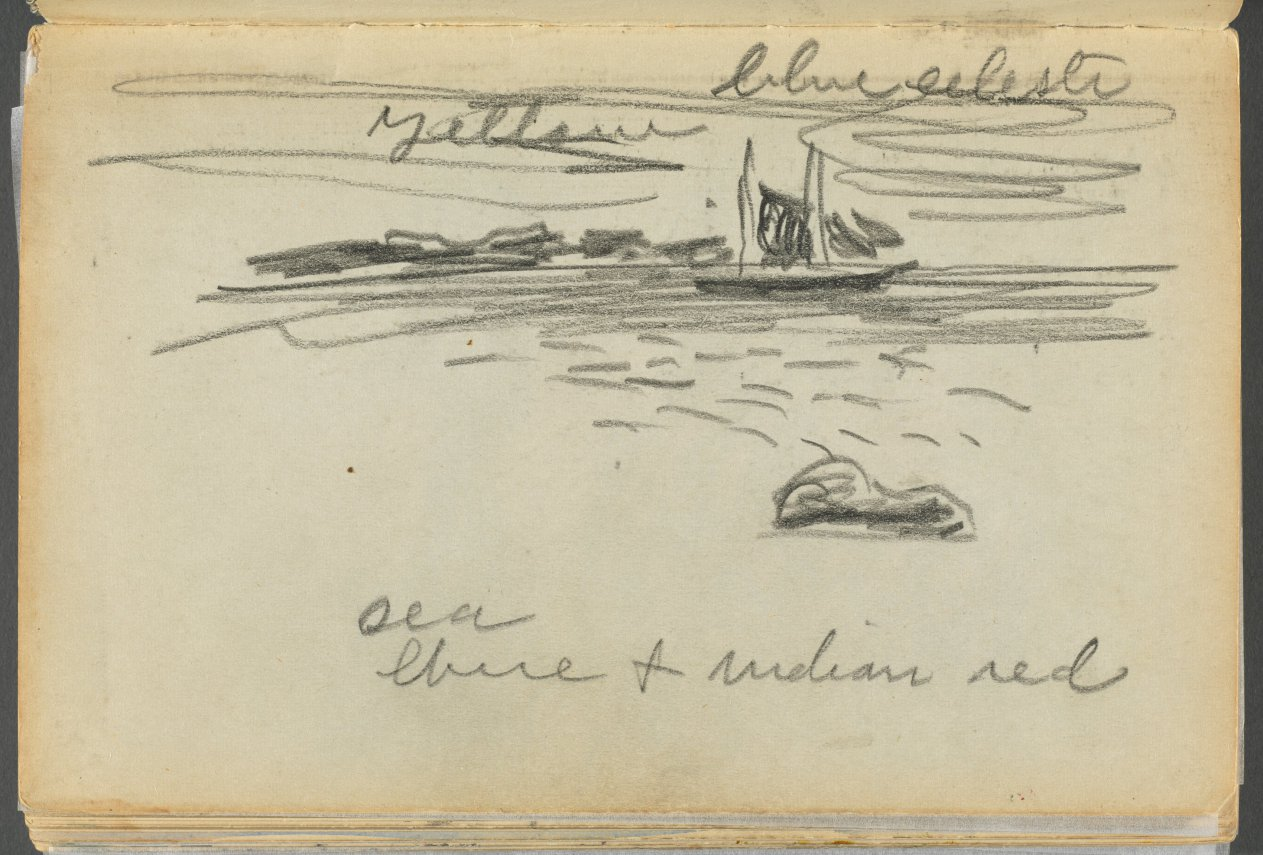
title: Sketchbook- The Granite Shore Hotel, Rockport, page 182: Sailboat with color notations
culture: America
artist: Maurice Prendergast (American, born Newfoundland [now Canada], 1858–1924)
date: 1905–10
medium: graphite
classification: Bound Volume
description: This sketchbook contains 72 pages of pencil drawings and 9 watercolors of Cape Ann. On the inside of the cover Prendergast wrote the address of the Granite Shore Hotel in Rockport, Massachusetts.